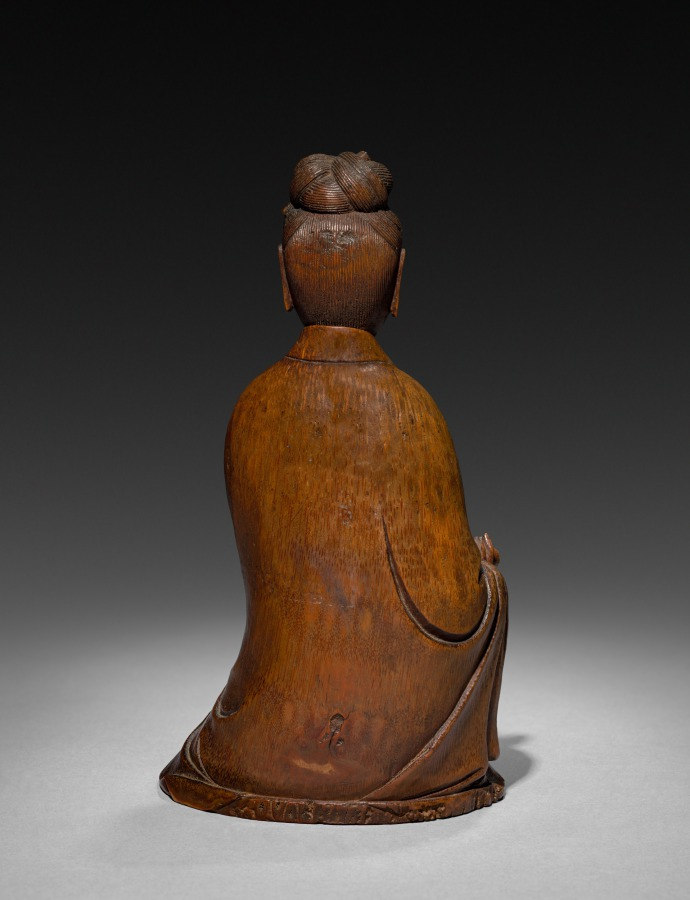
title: Seated Guanyin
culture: China, Qing dynasty (1644-1911)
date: 1600s-1700s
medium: bamboo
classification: Wood